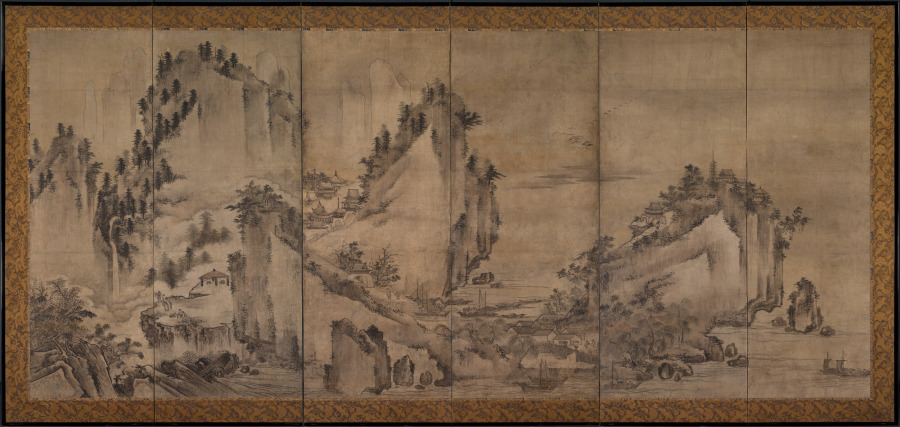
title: Landscape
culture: Japan, Muromachi period (1392–1573)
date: 1550–99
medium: One of a pair of six-panel folding screens; ink and color on paper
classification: Painting